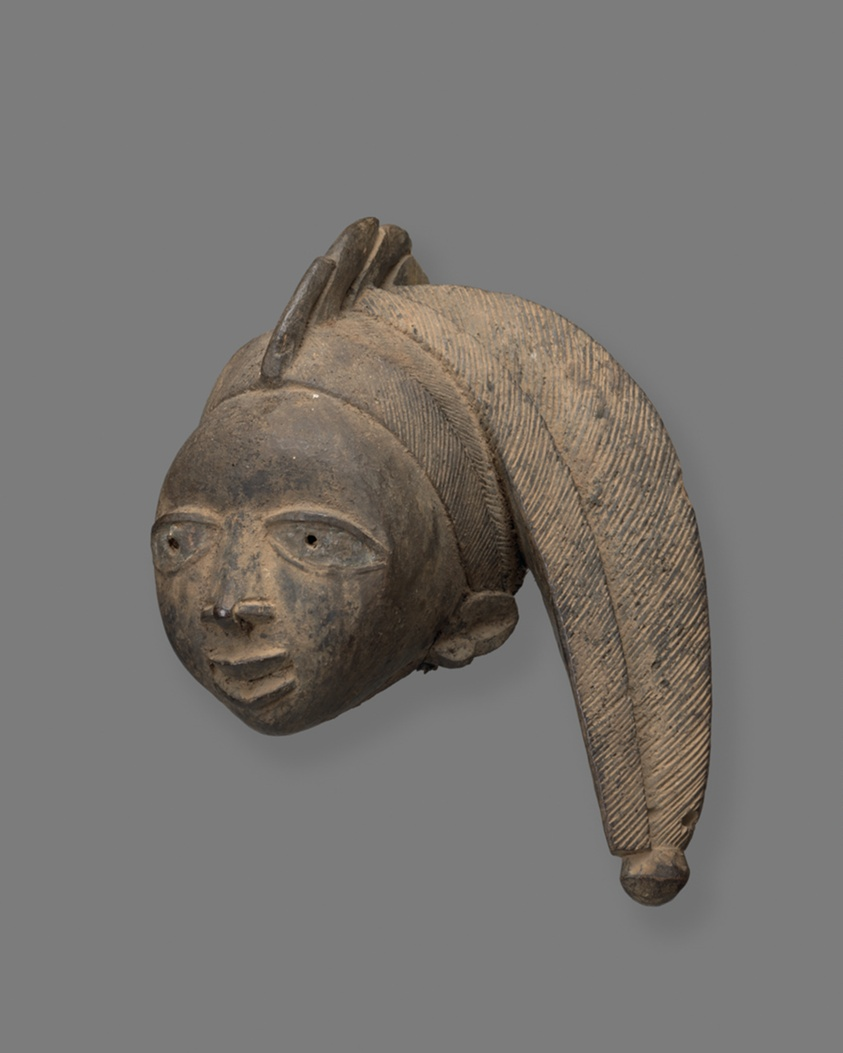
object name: Mask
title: Headdress (Ago Egungun)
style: yoruba, Arts of Africa, Coastal West Africa, african Art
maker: Ojerinde (died about 1914); Yoruba; Abeokuta, Nigeria; Coastal West Africa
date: Mid–late 19th century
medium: Wood and pigment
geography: Nigeria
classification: headdress; arts of Africa; masquerade; african art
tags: ancestors, family, ritual, medicine, hunter, masquerades, performance